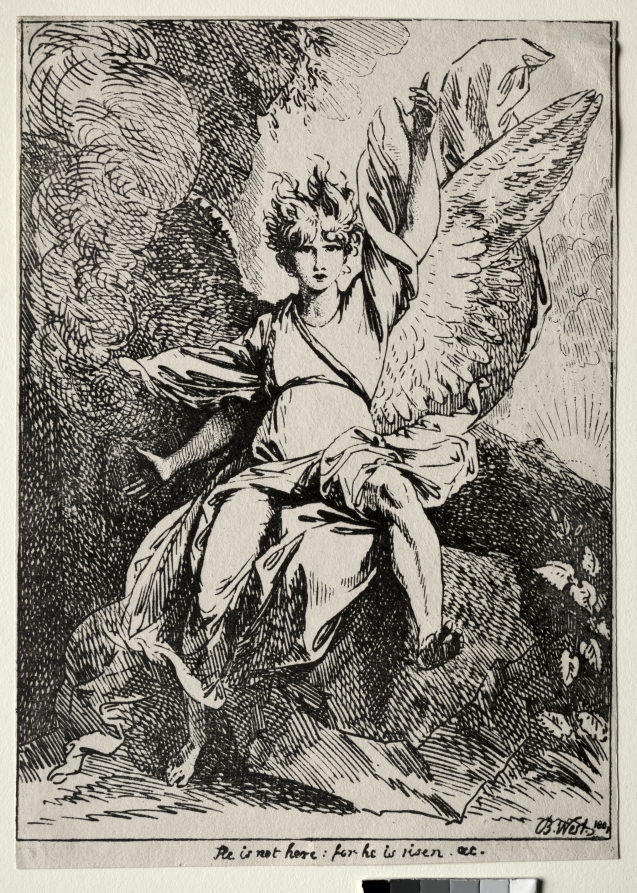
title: Specimens of Polyautography: The Angel at the Tomb of Christ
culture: America, worked in England, early 19th Century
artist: Benjamin West (American, 1738–1820)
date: 1801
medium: lithograph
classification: Print